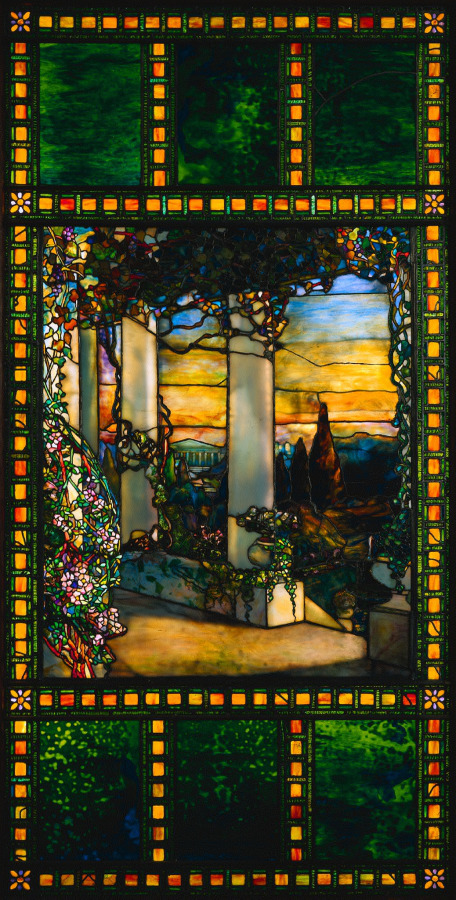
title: Hinds House Window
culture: America, New York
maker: Tiffany Glass & Decorating Company (America, New York, 1892–1902)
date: c. 1900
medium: leaded glass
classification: Glass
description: In this window commissioned for the Howell Hinds house around 1900, thousands of richly colored glass pieces have been arranged and layered to paint an idyllic three-dimensional scene that would have warmly glowed in the afternoon sunlight. Located at 2200 Overlook Road in Cleveland, Ohio, the house was demolished in 1930 in a similar fate as other nearby estates. Photographs show the placement of the window in the drawing room next to the fireplace as well as the opulent interiors Louis Comfort Tiffany designed for the library and dining room.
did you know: This window incorporates layered pieces of glass, producing shadows and creating a multidimensional quality.